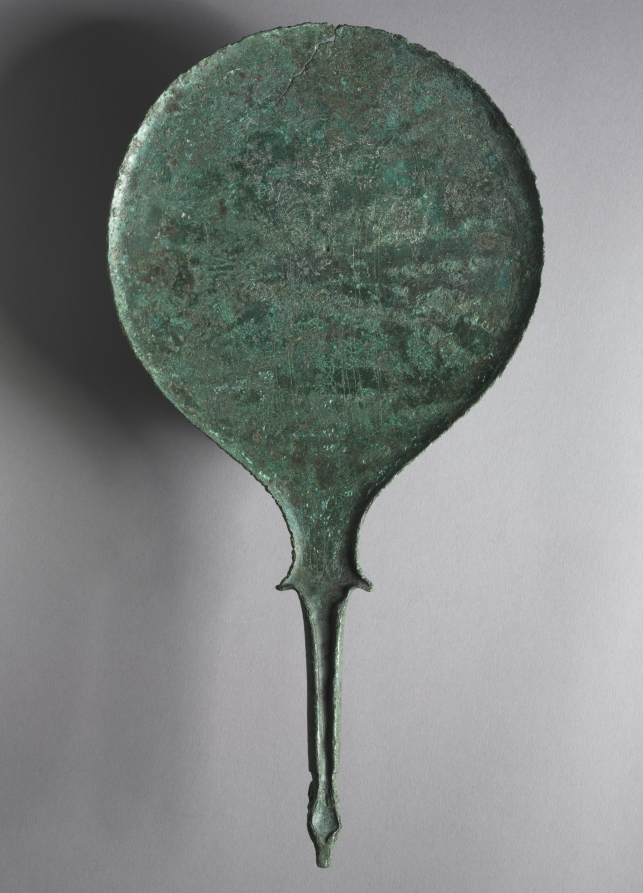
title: Mirror with Engraved Scene: Two Female Figures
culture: Etruscan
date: 330–300 BCE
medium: bronze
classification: Metalwork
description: Cast in one piece, this bronze mirror features a handle terminating in a stylized deer head. The front side of the disc, once highly polished and reflective, would have served as a mirror, while the reverse—now on display—features an engraved figural scene. Best observed with the aid of a line drawing, this shows two standing women, both draped and looking at one another. Without inscriptions, their identities remain uncertain, but the crescent overhead and the upright spear held by the righthand figure suggest that they may be the goddesses Artumes (Artemis) and Menerfa (Athena).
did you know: The piriform shape of this mirror suggests that it was produced in Praeneste (modern Palestrina).